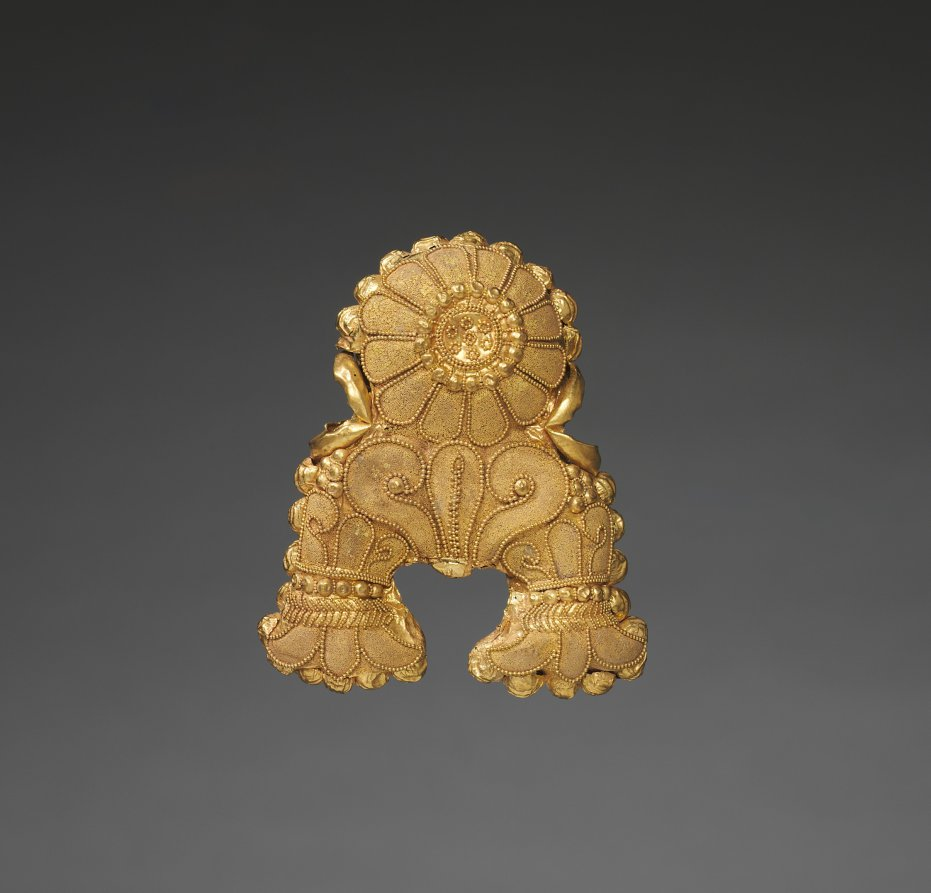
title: Triratna Pendant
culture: India, Uttar Pradesh or Madhya Pradesh, Shunga period (185–78 BCE)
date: 185–72 BCE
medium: gold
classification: Jewelry